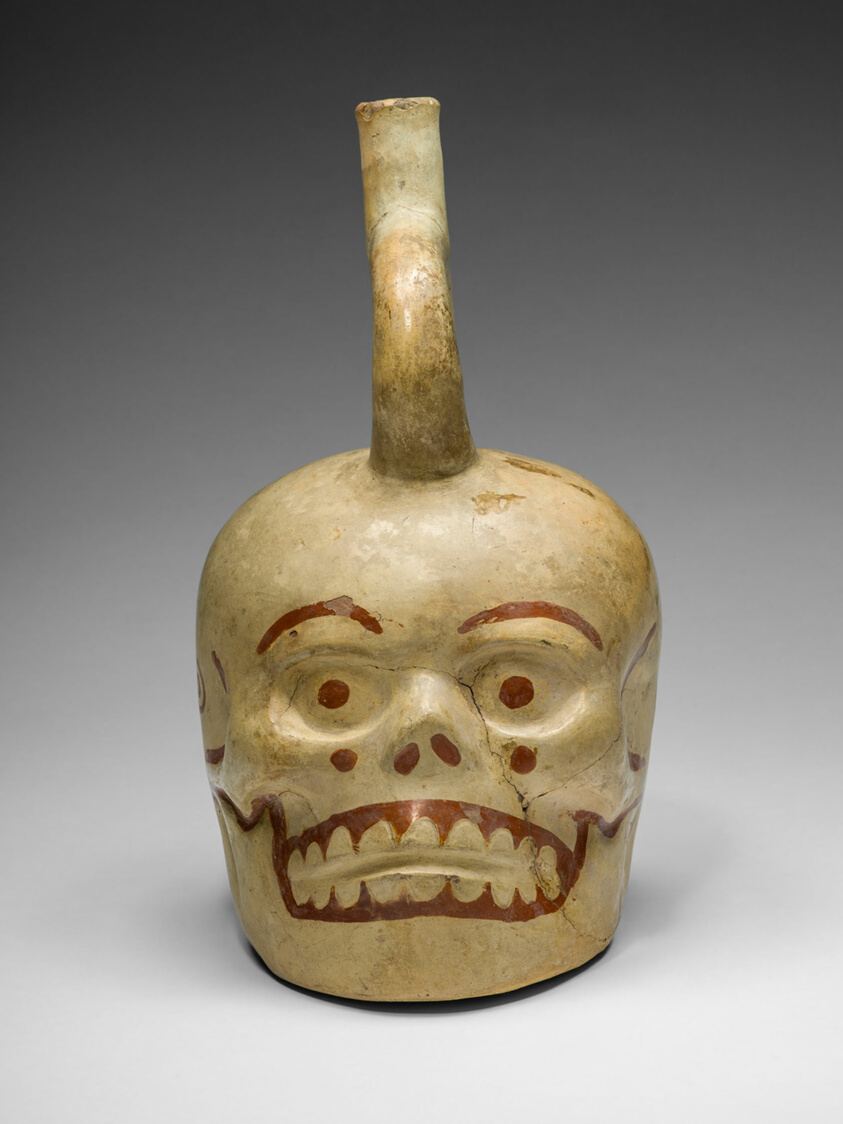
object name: Vessel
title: Vessel in the Form of a Skull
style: moche, mochica, early intermediate period, Pre-Columbian, americas, andes, Arts of the Americas, andean, south american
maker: Moche (North coast, Peru)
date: 100 BCE–500 CE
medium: Ceramic and pigment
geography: Peruvian North Coast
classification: earthenware; ceramics; vessel; art of the americas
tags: skulls, death